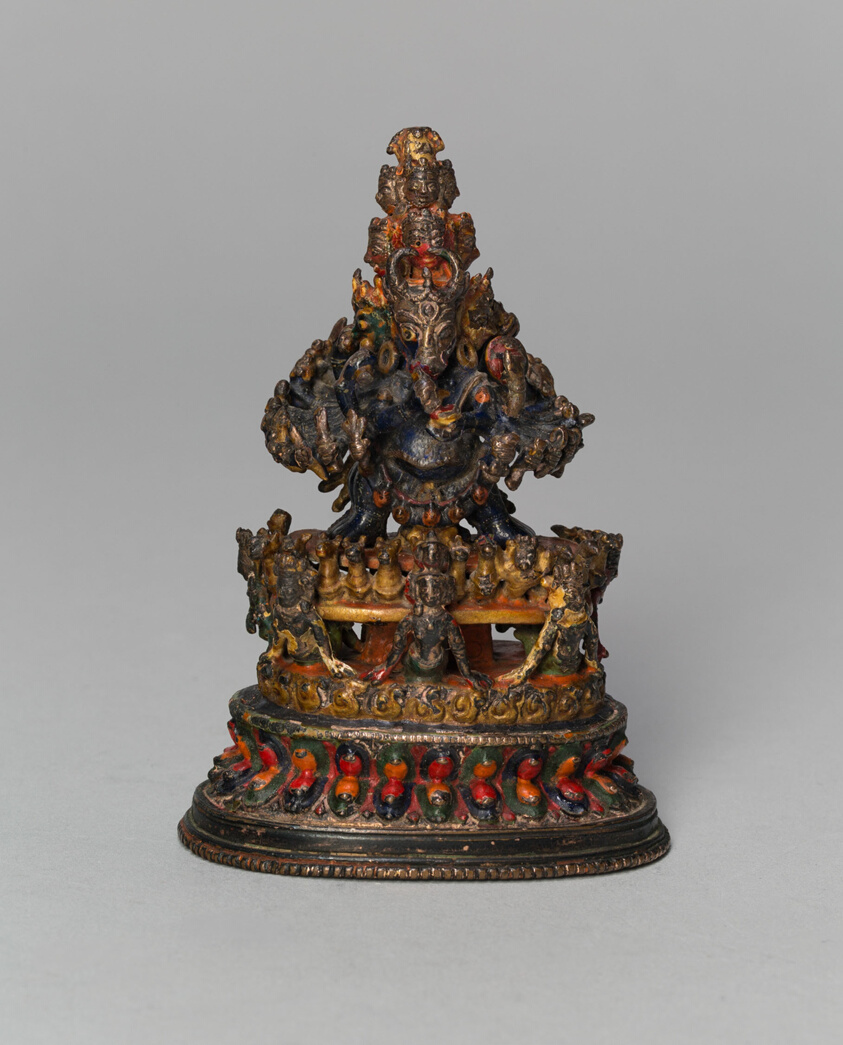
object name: Sculpture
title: Buffalo-Headed Vajrabhairava, a Wrathful form of Bodhisattva Manjushri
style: Himalayan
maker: Tibet; Southern Tibet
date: 15th century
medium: Bronze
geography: Southern Tibet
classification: bronze; metal; sculpture; asian art